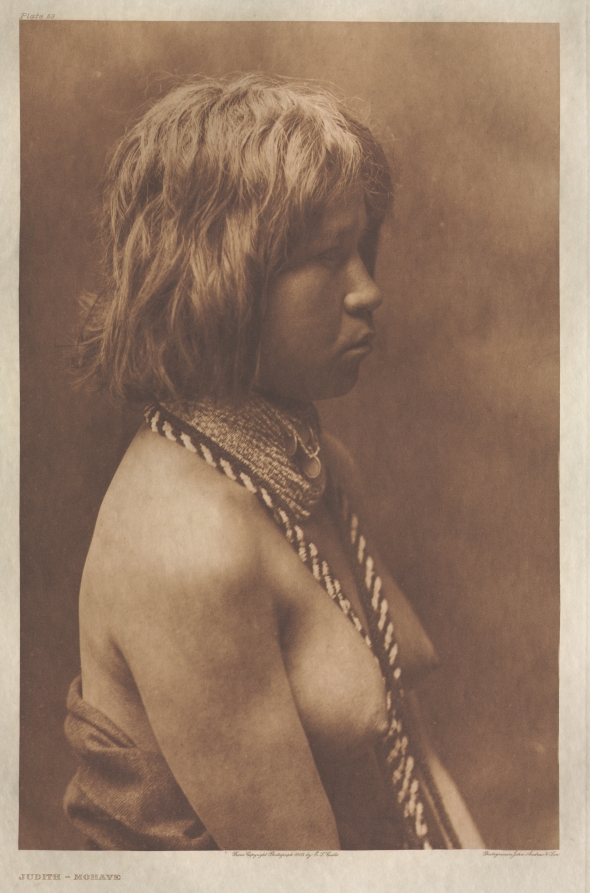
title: Portfolio II, Plate 59: Judith-Mohave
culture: America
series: The North American Indian: being a series of Portfolios picturing and describing the Indians of the United States, the Dominion of Canada, and Alaska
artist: Edward S. Curtis (American, 1868–1952)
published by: The University Press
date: 1903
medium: photogravure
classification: Portfolio